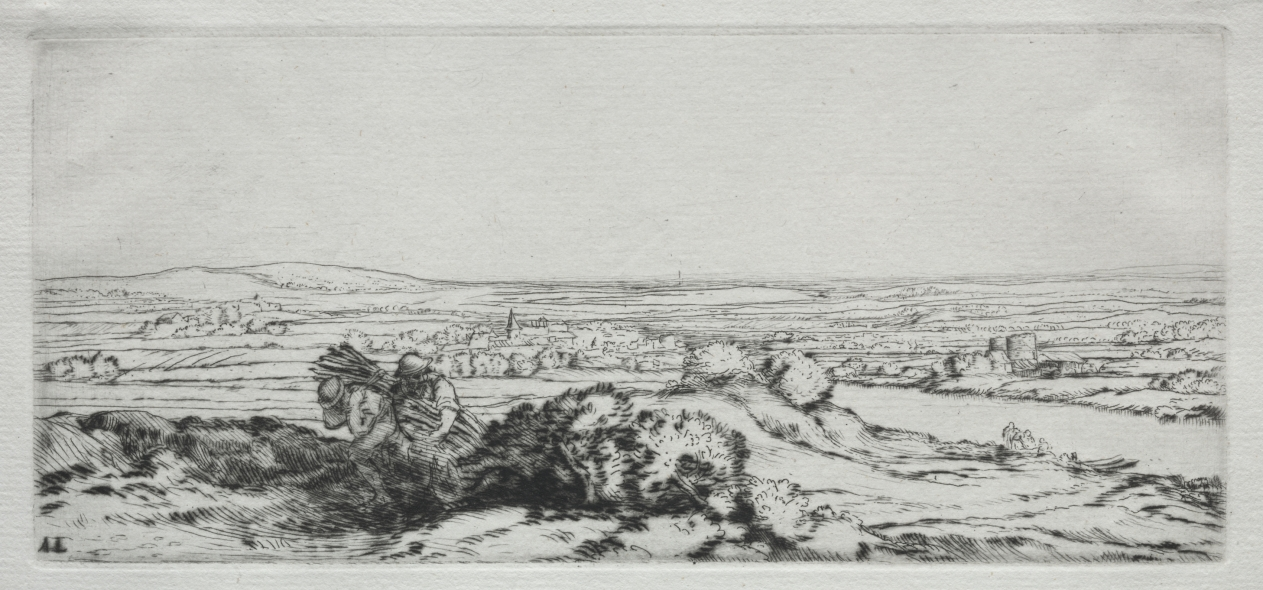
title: Valley of the Dunes (La Vallee des Dunes)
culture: France, 19th-20th century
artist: Alphonse Legros (French, 1837–1911)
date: c. 1857–1911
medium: etching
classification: Print